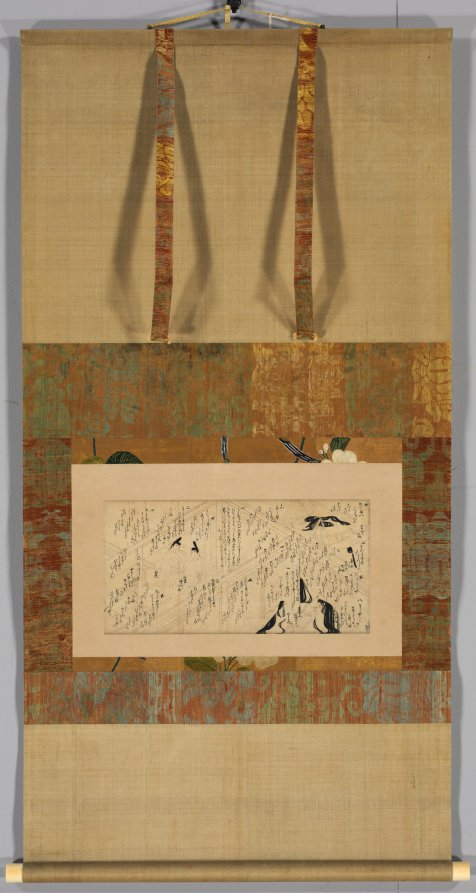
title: Scene from the Tale of the Wisteria Robe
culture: Japan, Muromachi period (1392–1573)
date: 1400s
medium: section of a handscroll mounted as a hanging scroll; ink on paper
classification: Painting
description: The Tale of the Wisteria Robe chronicles the family saga and spiritual wanderings of a noble whose garment has a signature scent. In the complete set of two scrolls, the paintings were preceded by textual passages and included dialogue floating over the characters depicted. This fragment of the story shows several figures engaged in private conversations held in chambers divided by sliding doors. Numerical notations in the text indicate the order in which things are being said.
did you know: Members of the court, both male and female, are depicted in dress and hairstyles from the earlier Heian period (794–1185).